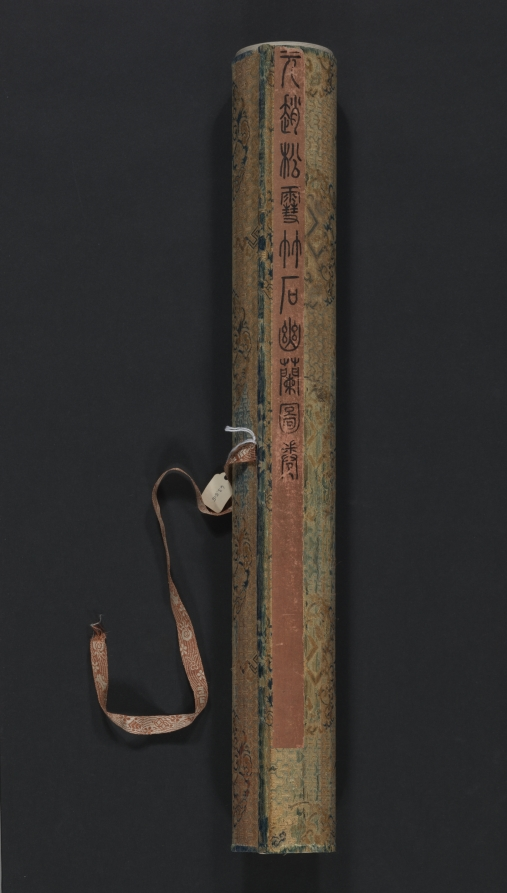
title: Bamboo, Rocks and Lonely Orchids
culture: China, Yuan dynasty (1271-1368)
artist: Zhao Mengfu (Chinese, 1254–1322)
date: 1271–1368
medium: Handscroll; ink on paper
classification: Painting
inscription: 竹石幽蘭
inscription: 孟頫為善夫寫. [印] 趙氏子昂; [印] 松雪齋; [印] 天水郡圖書印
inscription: 古人善書者必能畫點墨作蠅，便自有生意。松雪翁蘭石草聖飛帛筆法皆具，可寶也。安陽韓性 [印]明善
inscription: Colophon 2. Qiu Yuan 仇遠 (1247-after 1328), a respected poet during the Song and Yuan periods. He was linked to, among others, Zhao Mengfu and Gao Kegong. Zhao Mengfu painted a version of Nine Songs 九歌圖 for him, and Gao Kegong dedicated to him a painting titled Mountain Village 山村圖 (current whereabouts unknown). His poem here is also preserved in his collected works.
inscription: Colophon 3. Zheng Yuanyou 鄭元祐 (1292-1364), an erudite scholar and teacher of renown, active in Hangzhou and Suzhou. In the 1350s, when Gu Ying’s literary gatherings were at their peak, he was already elderly and participated in a limited way.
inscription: Colophon 4. Wu Kegong 吳克恭 (active mid-1300s), a friend of Gu Ying and Ni Zan 倪瓚 (1301–1374), a major Yuan painter.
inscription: Colophon 5. Angji 昻吉 (jinshi of 1348), of Western Xia 西夏 origin and a poet of distinction. He wrote an introduction to the painting Literary Gathering at Yushan 玉山雅集圖, of which Zhang Wo was the painter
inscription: Sheet 2. Yuan: friends of Gu Ying Colophon 6. Wang Zifang 王孜方 (active mid-1300s), an official who, at the time of his visits to Gu Ying’s estate, had reached the rank of Minister. He is better known under the name Wang Keju 王可矩.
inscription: Colophon 7. Ke Jiusi 柯九思 (1290–1343), a major official who served in the Kuizhang Pavilion 奎章閣 and as an advisor to Emperor Wenzong in matters of calligraphy and painting.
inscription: Colophon 8. Yu Li 于立 (active mid-1300s), a Daoist recluse, poet, and close friend of Gu Ying, so much so that during his visit to Gu Ying’s estate he was given accommodation in a special pavilion. His poem here is also preserved in Gu Ying’s Cao tang ya ji.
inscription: 至正十一年十月廿八日男奕百拜堇觀 [印] 趙奕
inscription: Colophon 10. Yu Ji 虞集 (1272-1398), a major official and literary figure who also served in the Kuizhang Ge. His poem is recorded in his collected works. The poem is one of a set of four inscribed at the request of Wang Huayu 汪華玉 on Orchids and Rock 蘭石圖 by Zhao Mengfu, obviously a different, long lost, painting. Wang Huayu was an official and a collector (jinshi of 1327). Yu Ji’s colophon here was written before 1348 and during his retirement in Linchuan 臨川, Jiangxi, possibly sent from there. It is possible he had not seen the painting, and his calligraphy here appears to be rather casual and detached, jotting down an old poem without much care, contrary to his earlier practice.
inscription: Colophon 11. Sun Shi 孫時 (mid-1300s–early 1400s), a native of Yuncheng 鄆城, Shandong, and a jinshi of 1390. He may have been quite young when paying a visit to the Yushan gatherings in the late 1340s and early 1350s.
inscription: Colophon 12. Zhang Zhu 張翥 (1287–1368), Qiu Yuan’s disciple and a poet of renown, who enjoyed a belated career in officialdom and was known for his integrity.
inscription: Sheet 4. Yuan and Ming: further friends of Gu Ying; colophon 17 begins the early Ming sequence. Colophon 13. Zhang Wo 張渥 (active c. 1336-after 1364), a frustrated scholar, a poet, and a painter of landscape and figures. An active participant in Gu Ying’s literary circle, he painted the Literary Gathering at Yushan, a pictorial document of the individuals and activities on Gu Ying’s estate. His rendering of Nine Songs is well known, and one version is in the collection of the Cleveland Museum of Art (see 1959.138). His poem here is also found in Gu Ying’s Cao tang ya ji, under the entry “ti Zhao Hanlin mo lan 題趙翰林墨蘭” (inscribed on the Ink Orchid by Zhao the Hanlin academician). This is a rare instance of calligraphy as well as signature by the artist.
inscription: 觀吳興公竹石幽蘭圖使人鄙吝頓消。其筆勢從橫天真爛澷，一出於二王書法。冝仲瑛寳而玩之異於常品也。至正八年十月天台陳基書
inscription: Colophon 15. Zhang Shen 張紳 (active about 1340–after 1385), a respected calligrapher and participant in Gu Ying’s literary gathering. He resided in Kunshan, the same city where Gu Ying’s estate lies. In the third line of the poem, he mentioned Gu Ying’s hao, “Jinsu 金粟.” This was a name he assumed later in life, after the death of his mother in the year 1356. Thus this inscription must have been written after that date.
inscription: Colophon 16. Wang Sun 汪遜 (active mid-14th century), a little-known native of Kuaiji 會稽, who may have been one of the infrequent visitors to Gu Ying’s estate.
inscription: Colophon 17. Hu Guang 胡廣 (1370-1418) is the first Ming colophon writer on this scroll. He was an official of great power in the court and a trusted advisor of Emperor Chengzu; he served as the Grand Academician of the Hall of Literary Profundity 文淵閣大學士 and Grand Academician of the Left Secretariat of the Heir-Apparent 左春坊大學士.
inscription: Sheet 5. Early Ming Colophon 18. Wang Yinshi 王尹實 (active about 1403–about 1424), a native of Siming 四明, Zhejiang, and a minor official and calligrapher.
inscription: Colophon 19. Zhang Yuchu (signed here as “Wuwei 無 為”), the forty-third Heavenly Master of the Zhengyi sect of Daoism. A man of erudition, he was also a poet, painter, and calligrapher. A modified version of the poem here was published in his collected works titled Xian quan ji 峴泉集. A slight modification in the first line is the only change: “Wu xing miao yao nian bing xue zi 吳興玅年氷雪姿.”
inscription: Colophon 20. Yao Guangxiao 姚廣孝 (1335-1418), a Buddhist monk, scholar, and counselor to Chengzu in his successful attempt at usurpation of the throne. Yao Guangxiao was a controversial figure but wielded enormous power.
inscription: Sheet 6. Wang Ning alone Colophon 21. Wang Ning 王寧 (d. 1411) signed as “Qingzhen 清真” in this colophon. One of the three seals reveals his identity as the Yongchun Hou 永春侯 [Marquis of Lasting Spring] (appointed 1402), and the husband of Princess Huaiqing 懷慶公主 (1328-1398), the sixth daughter of the founder of the Ming dynasty, Zhu Yuanzhang. This colophon postdates 1402.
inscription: Sheet 7. Mid-Ming Colophon 22. Ou Yi’an 區易安 (active first half of 15th century), unknown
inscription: Colophon 23. Chen Lian 陳璉 (1370-1454), a native of Dongguan 東莞, Guangdong 廣東, and an official admired for his erudition and perspicacity. In view to the known calligraphic style of Chen Lian, this colophon appears to be a transcription and not written by him.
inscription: Colophon 24. Wei Ji 魏驥 (1374-1471) enjoyed longevity (he lived to the age of ninety-eight) and an extended length of service as an official. A jinshi of 1406, he eventually became the Minister of Personnel in Nanjing 南京吏部尚書. The colophon here is dated 1434, when he was invited to view the painting by the Court Musician Mo Zhizhong 莫至翀, its owner. Again, in view of its calligraphic style, this was not written by him, but is a transcription from the original.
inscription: Colophon 25: Zhang Yi 章鎰 (active 1462-1473), a Ningbo native and an official with a reputation for courage and integrity.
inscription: Sheet 8. Further mid-Ming Colophon 26. Yin Zhi 尹直 (1427-1511), a controversial figure in Ming politics in spite of his erudition and high position as the Minister of War 兵部尚書.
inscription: Colophon 27. Zou Yu 鄒虞 (active 1460-1520; jinshi of 1490), a native of Hangzhou. In 1510, he was appointed Administrative Vice Commissioner in Guangdong.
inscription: Sheet 9. Xu Shouhe 徐守和 alone Colophon 28. Xu Shouhe 徐守和 dated his entry in 1629. Since he wrote it in his own studio, The Lesser Qingbi Pavilion 小清閟, he was likely the owner of the scroll. Xu’s life is not well documented; he was a connoisseur of note during the last years of the Ming dynasty rule. He may have acquired the Cleveland scroll from Wu Ting, whose seals appear here.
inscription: Sheet 10. The mounter’s note. Xu Shudong 徐曙東 of Jiaxing 嘉興 made the remounting on the first day of sixth month, 1802.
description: Bamboo and orchids are motifs associated with the virtues of the scholar-official. Bamboo that bends but does not break stands for moral integrity, endurance, and loyalty. Wild, fragrant orchids that bloom in the shadow symbolize modesty and the aura of learnedness. Rocks are often considered to be miniature versions of mountains that form the universe. This monochrome ink painting is brushed on paper in a masterfully calligraphic manner. While the rocks are delineated in chalky, dry strokes showing the effect of flying white (feibai), the bamboo and orchids are drawn with a swift brush demonstrating the virtuosity of the artist.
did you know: One of the many inscriptions records that the handscroll was last remounted by Xu Shudong 徐曙東 of Jiaxing 嘉興 in 1802.